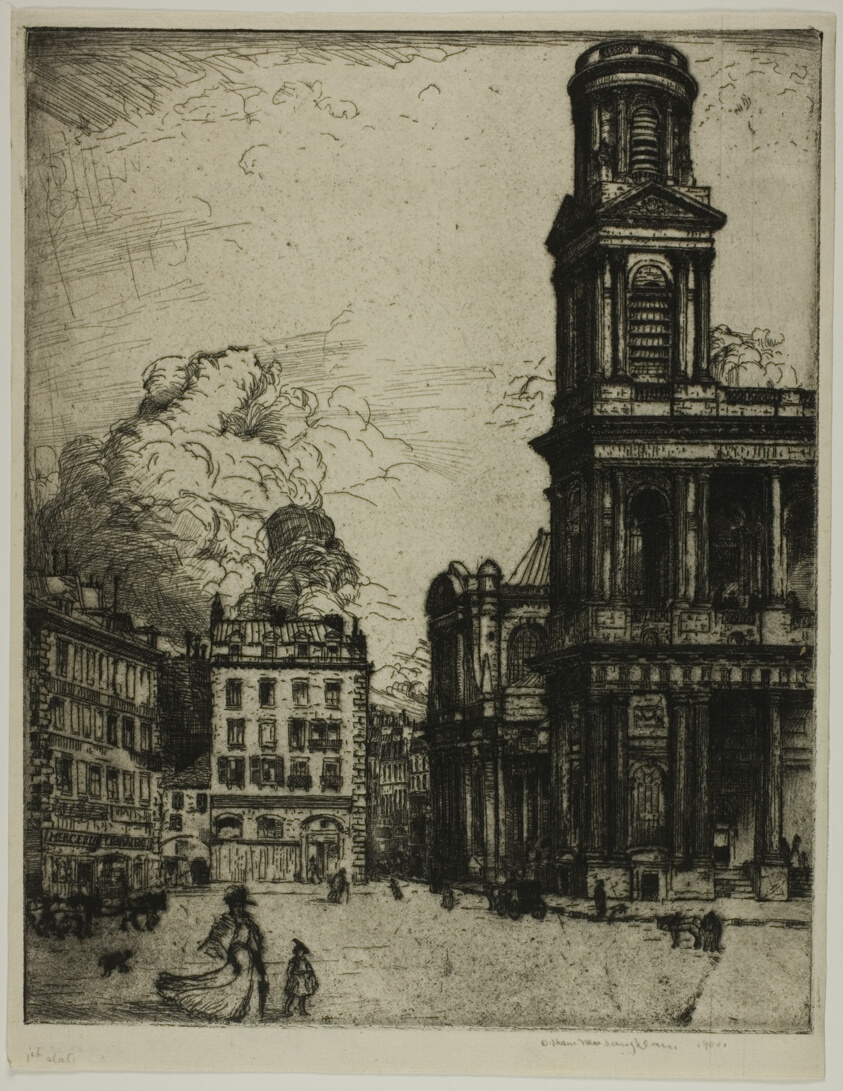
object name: Print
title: Saint Sulpice, Paris: La Grande Tour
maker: Donald Shaw MacLaughlan (American, born Canada, 1876-1938)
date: 1900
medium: Etching in black on ivory laid paper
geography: United States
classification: etching; print; prints and drawing